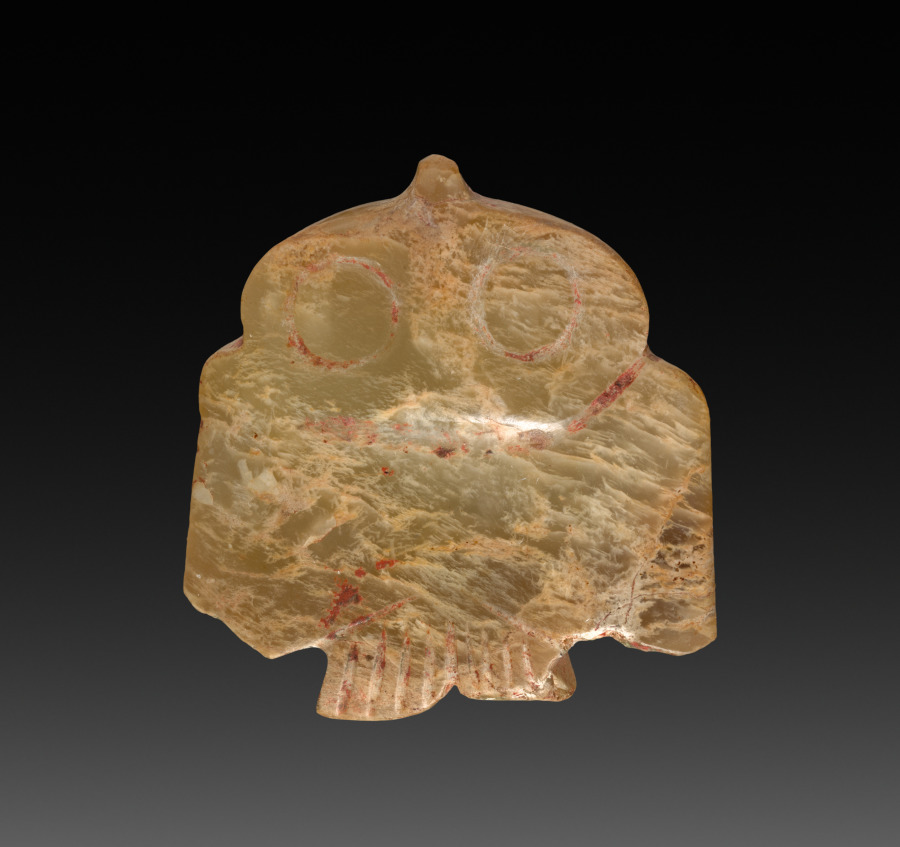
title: Bird in Flight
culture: China, Shang dynasty (c. 1600–c. 1046 BCE)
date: 1300–1100 BCE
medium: jade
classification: Jade